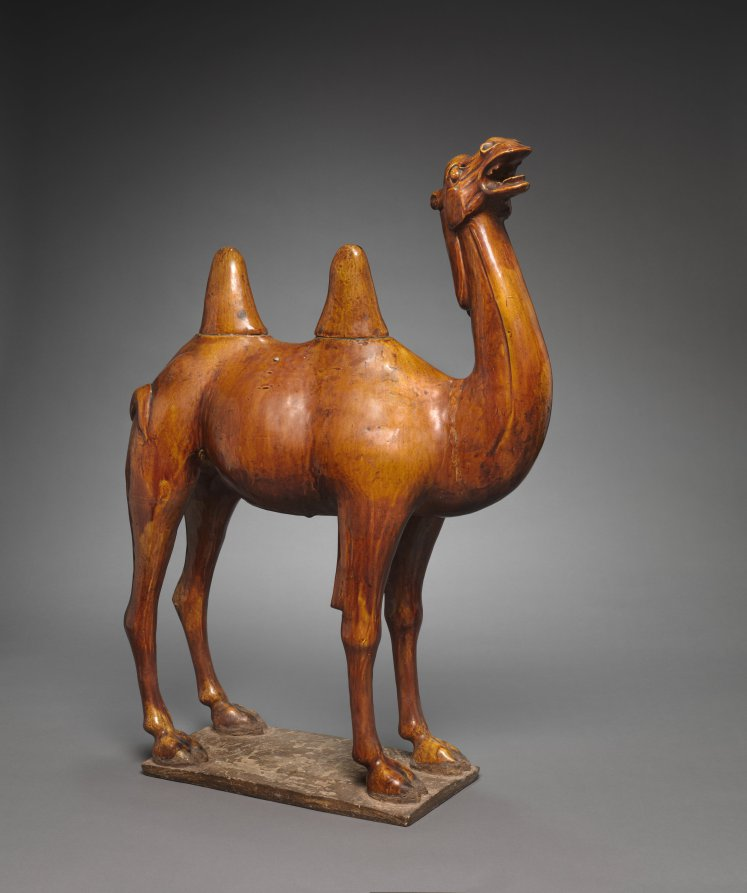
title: Camel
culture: China, Tang dynasty (618-907)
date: 700s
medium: glazed earthenware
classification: Sculpture